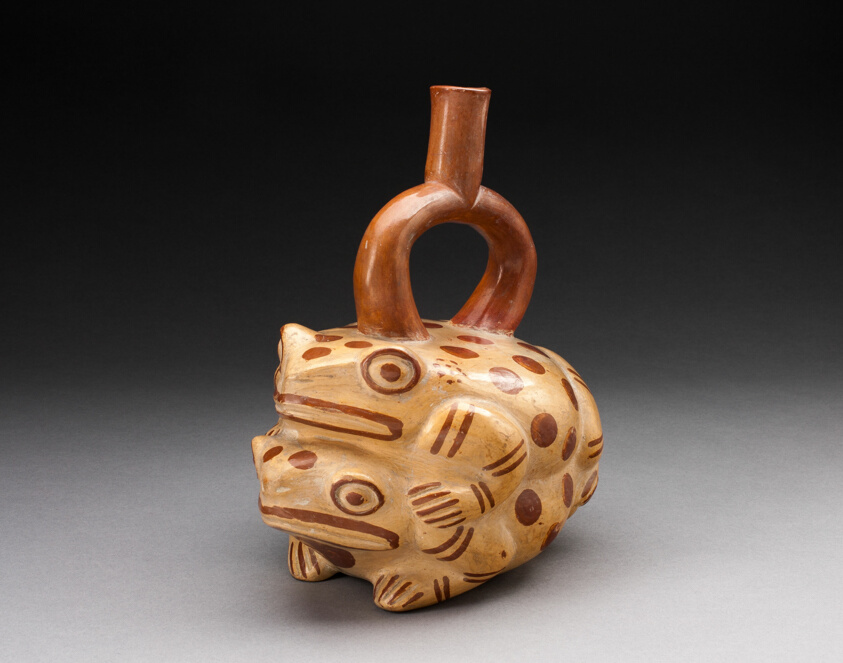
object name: Vessel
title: Vessel Depicting Frogs Mating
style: moche, mochica, early intermediate period, Pre-Columbian, americas, Arts of the Americas, andean, andes, south american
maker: Moche (North coast, Peru)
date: 100 BCE–500 CE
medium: Ceramic and pigment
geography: Peru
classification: earthenware; art of the americas; ceramics; vessel